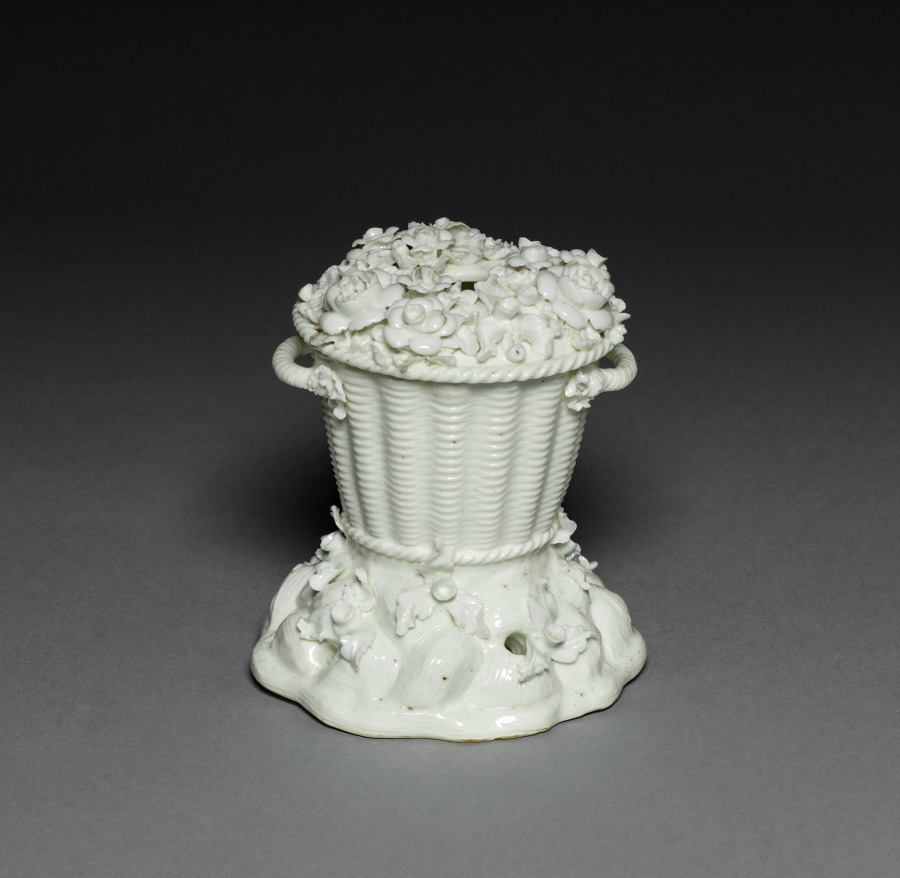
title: Potpourri Vase with Cover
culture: France, Saint Cloud, 18th century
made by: Saint Cloud Porcelain Factory (French)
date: c. 1740–60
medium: soft-paste porcelain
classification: Ceramic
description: These vases were created to contain potpourri, a mixture of flowers, herbs, and spices emitting ambient fragrance. This specific function offered a particularly fertile ground for the development of French porcelain, as manufactories experimented with forms, surface ornamentations, and placement of perforations.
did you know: Prior to Saint-Cloud's development of soft-paste porcelain in the 1690s, rumors spread throughout Europe that the prized material was made by burying a variety of materials, including lobster shells, in the ground for eighty years.